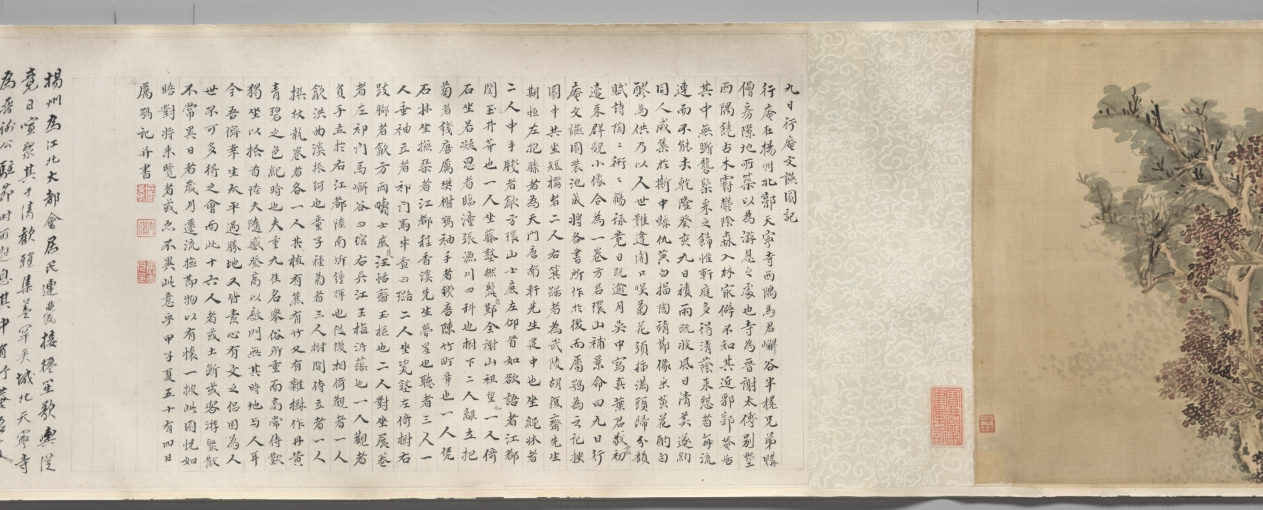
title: The Ninth Day Literary Gathering at Xing’an [Temporary Retreat]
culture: China, Qing dynasty (1644-1911)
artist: Fang Shishu (Chinese, 1693–1751)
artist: and Ye Fanglin (Chinese, active late 1600s–mid-1700s)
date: 1743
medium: Handscroll; ink and color on silk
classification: Painting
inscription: Fang Shishu's seal at beginning of painting: Ou ran shi de 偶然拾得. Ye Fanglin's seal at end of painting: Fanglin 芳林. Frontispiece title dated 1743 and 3 seals of Chen Bangyan 陳邦彦 (1678-1752).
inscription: 行庵在揚州北郭天寧寺西隅，馬君嶰谷半槎兄弟購僧房隙地所築，以為游息之處也。寺為晉謝太傅別墅。西隅饒古木，䨴鬱陰森，入林最僻，不知其近郛郭。庵居其中，無斲礱髤采之飾，惟軒庭多得清蔭，來憩者每流連而不能去。乾隆癸亥九日，積雨既收，風日清美，遂約同人，咸集於斯，中縣［懸］仇英白描陶靖節像，采黃花，酌白醪為供，乃以人世難逢開口笑，菊花雖插滿頭歸分韻賦詩。陶陶衎衎，觴詠竟日。既逾月，吳中寫真葉君敬［震］初適來，群貌小像，合為一卷，方君環山補景，命曰九日行庵文讌圖。裝池成，將各書所作於後，而囑鶚為之記。記按圖中共坐短榻者二人：右箕踞者，為武陵胡復齋先生期恆；左抱膝者，為天門唐南軒先生建中也。坐繩床者二人：中手牋者，歙方環山士庶；左仰首如欲語者，江都閔玉井華也。一人坐藤塾捻髭者，鄞全謝山祖望也。一人倚石坐若凝思者，臨潼張漁川四科也。樹下二人：離立把菊者，錢唐厲樊榭鶚；袖手者，錢唐陳竹町章也。一人憑石床坐撫琴者，江都程香溪先生夢星也。聽者三人：一人垂袖立者，祁門馬半查曰璐；二人坐瓷塾，左倚樹、右跂腳者，歙方西疇士疌 、汪恬齋玉樞也。二人對坐展卷者，左祁門馬嶰谷曰琯，右吳江王梅沂藻也。一人觀者，負手立於右，江都陸南圻鐘輝也。從後相倚觀者一人，歙洪曲溪振珂也。童子種菊者三人：樹間侍立者一人，撰杖、執卷者各一人。其植有蕉、有竹，又有雜樹，作丹黃青碧之色，紀時也。夫重九佳名，舉俗所重，而高常侍歎獨坐而搔首，陸天隨感登高以剫門，無其時地與人耳。今吾儕幸生太平，遇勝地，又皆素心有文之侶，固人世不可多得之會；而此十六人者，或土斷，或客游，聚散不常。異日者，歲月遷流，撫節物以有懷，一披此圖，悅如晤對。將來覽者，或亦不異此意乎。甲子夏五十有四日厲鴞記並書。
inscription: 揚州為江北大都會，居民連甍接楹，笙歌輿從，竟日喧聚，其於淸歌雅集，葢罕矣。城北天寧寺，為晉謝公駐節時所游息，其中有行庵，吾友馬君嶰谷、半查兄弟之小築也。地不踰五畝，而老樹古藤，森蔚相望，皆千百年物，間以修竹，春鳥秋蟲，更唱迭和，其間曲廊高榭，位置閑適。出門未數百步，即黃塵濁流極目，令人作惡。而此中獨蕭然有人外之思。乾隆八年九日，嶰谷兄弟招集同社一十四人祀陶公，出所藏仇實父白描像懸於閣上，各賦一詩。予方留滯西泠，未得預也。又踰旬而予至，諸君方擬繪圖記事，嶰谷曰：是不可無君。乃以展日更舉，令予得陪卷軸之末；而洪君曲溪，兩度皆以病失約，然故吟社中人也，亦補入焉。予太息謂諸君曰：謝公之風流，千古如在；然其游息於斯也，則與東山賓從之樂稍不同矣。公之為是行也，蓋以符氏之亂，思北定中原也。而其時公巳困於讒口，不自安於朝；雖在河朔極有可乘之會，而神明內索，徘徊不克自前。老師左次，竟無尺寸之功，坐失事幾。吾常過邵伯之埭，吊法雲之荒祠，未嘗不喟然累啼，以為明德之衰也。至若九日嘉名，陶公高格，固在羲皇懷葛之間；然而讀其 止酒之詩，蒼梧漢水之感，以瘦詞寄其孤憤則夫黃花白酒，蓋亦不得巳而漫與焉者。今吾輩生逢太平之日，書淫墨癖，是處留連，胸次中了無一事，為江湖之幸民，論人雖甚媿，論其時與地，則不可不私相慶也。諸君曰：善。圖之詳巳見於厲君樊榭記中。予之許為嶰谷兄弟序斯圖也，三年於茲；今夏重披圖捉筆，而唐丈南軒，巳化為異物矣。對酒當歌，人生幾何，願與諸君並日相遇從焉。丙寅夏杪孤山社小泉翁全祖望序。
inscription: 6 additional colophons and 15 additional seals: 1 colophon, dated 1746, and 1 seal of Huang Zhijun 黃之雋 (1668-after 1746); 1 colophon and 2 seals of Zha Xiang 查祥 (1718 jinshi); 1 colophon, dated 1746, and 3 seals of Zhang Siwen 張思問; 1 colophon, dated 1748, and 4 seals of Shao Dong 卲東 (1721 jinshi); 1 colophon, dated 1753, and 2 seals of Fang Shiju 方世舉 (signing as Fang Funan 方扶南); 1 colophon, dated 1808, of Ruan Yuan 阮元 (1764–1849); 3 seals unidentified.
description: By the 1700s, Yangzhou was flourishing both economically and culturally as the most prosperous city in China, having surpassed all other Jiangnan cities in their creation of gardens. This group portrait commemorates a literary gathering in the private garden of the salt merchants and art patrons Ma Yueguan (1688–1755) and his brother Ma Yuelu (1697–after 1766) in Yangzhou. Ma Yueguan received imperial recognition for providing financial aid and food relief for those affected by flood and drought. Ma Yueguan is seen seated at the end of the painting holding an open scroll while Ma Yuelu stands behind the qin instrument player. Among the guests were officials, scholars, poets, painters, and merchants, a mix of local members of a poetry club reflecting increasing social diversity.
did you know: The two hosts and their fourteen guests were all officials, scholars, poets, painters, and salt merchants.